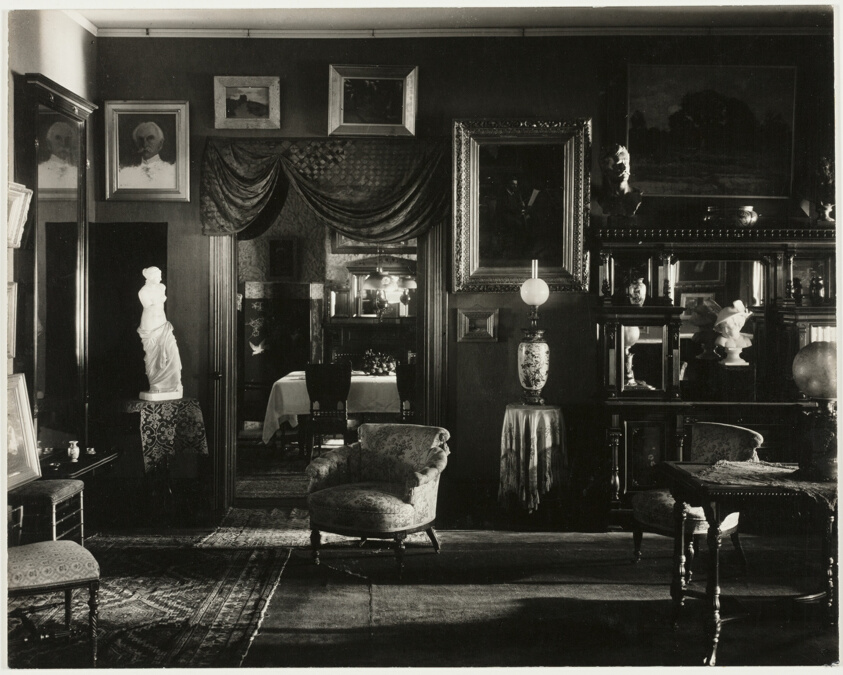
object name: Photograph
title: Lake George, Oaklawn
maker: Alfred Stieglitz (American, 1864–1946)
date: 1912/13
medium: Gelatin silver print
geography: United States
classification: gelatin silver (developing-out-paper) pr; photographic process; photography; photograph